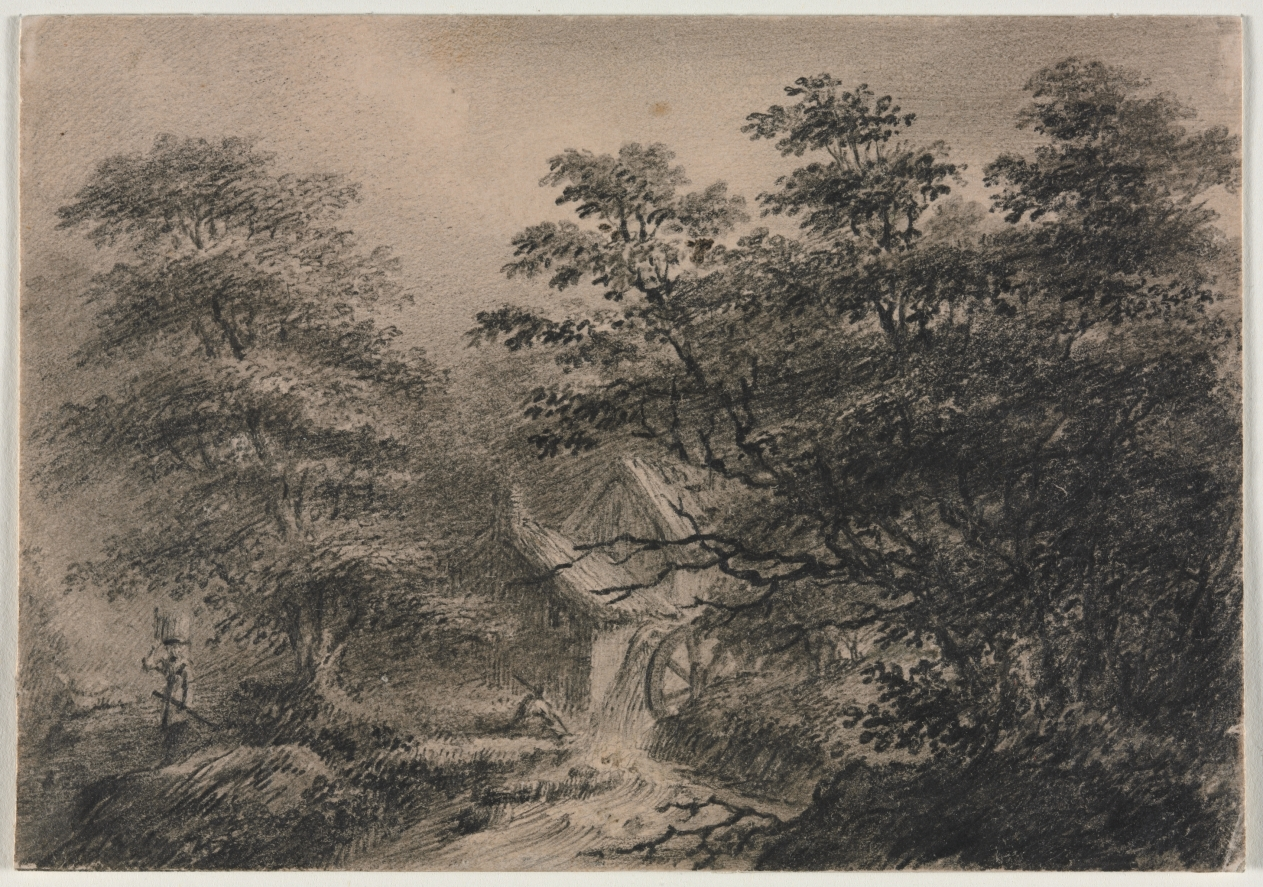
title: Landscape with a Mill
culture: England, 19th century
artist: Charles Norris (British, 1779–1858)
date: c.1812–58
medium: graphite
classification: Drawing